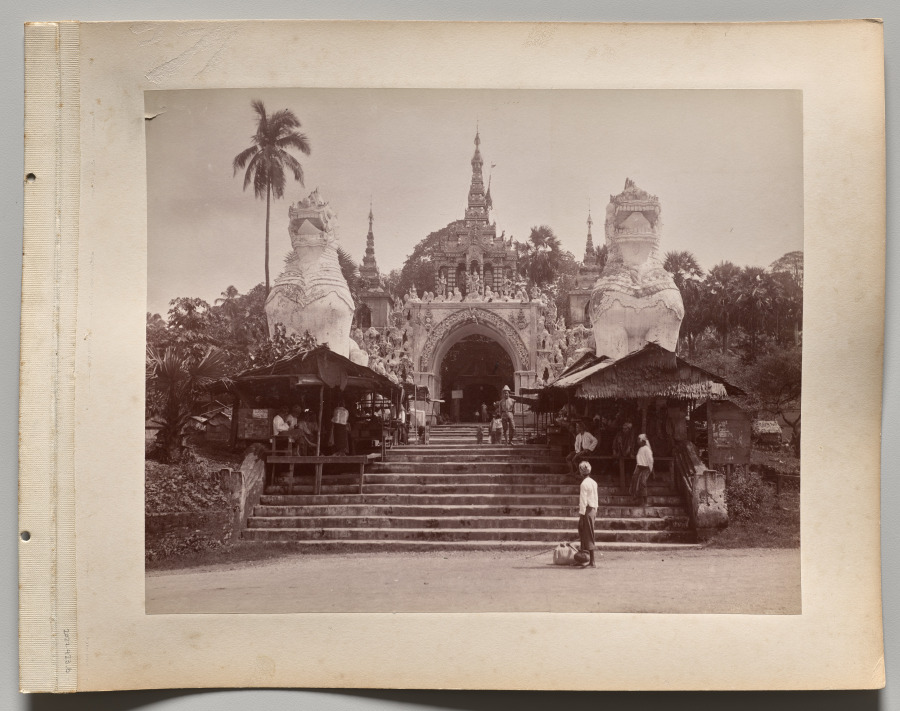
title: Untitled (steps and building, verso)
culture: England, 19th century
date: 1870s-1880s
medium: albumen print mounted on an album page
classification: Photograph